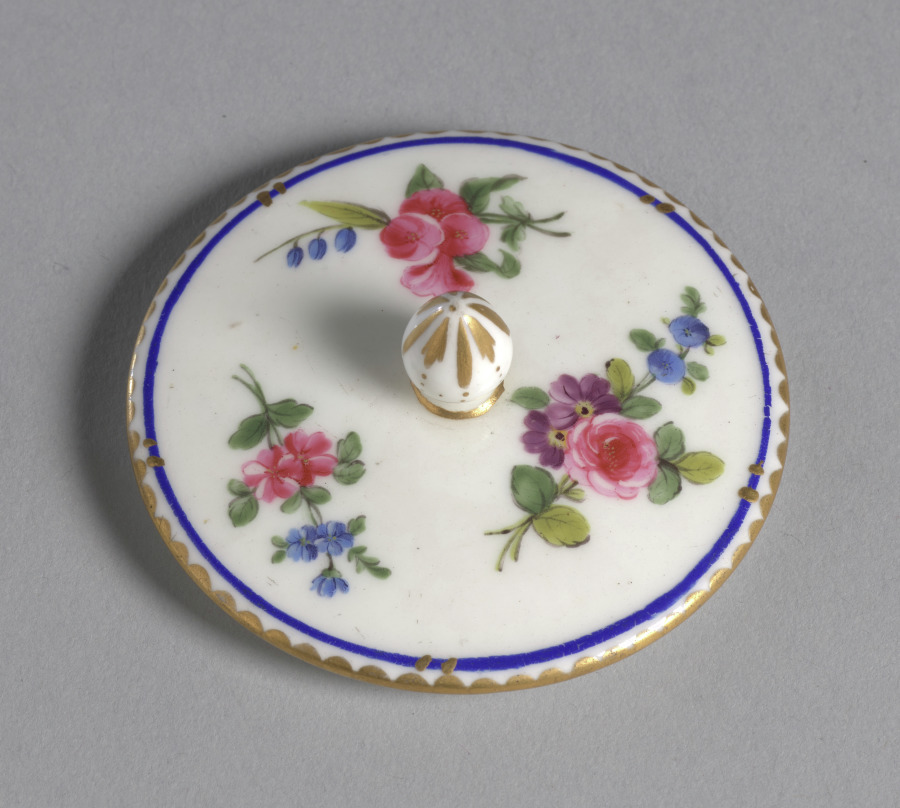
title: Jam Pots on Stand (lid)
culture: France, 18th century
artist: Sèvres Porcelain Factory (French, est. 1756)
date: c. 1760's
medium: porcelain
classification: Ceramic